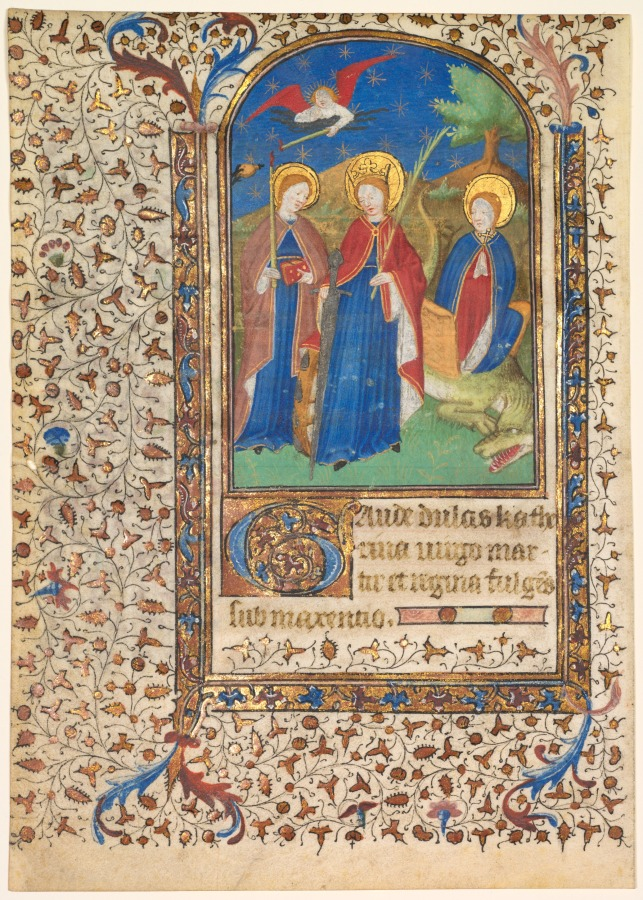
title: Leaf from a Book of Hours: Sts. Geneviève, Catherine of Alexandria, and Margaret (recto) and Text (verso)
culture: France, Paris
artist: workshop of Boucicaut Master (French, Paris, active about 1410–25)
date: c. 1415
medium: ink, tempera, silver, and gold on vellum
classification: Manuscript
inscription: Gaude dulcis katherina virgo martr et regina ful ges sub marinuo...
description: This leaf’s illumination includes Saints Geneviève, Catherine of Alexandria, and Margaret, all early church saints, virgins, and martyrs. During the 1400s and 1500s, the popularity of female saints increased, as did the literacy rate among women, thanks to books of hours. Saint Genevieve is shown with a candle the devil is trying to extinguish while an angel relights it. Saint Catherine, in the center, holds a palm branch and a sword, with which she was executed. Saint Margaret stands on the dragon from whom she emerged clean and unharmed when the cross she carried irritated the dragon’s innards.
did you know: A typical book of hours contains around a dozen suffrages or individualized prayers to specific saints.